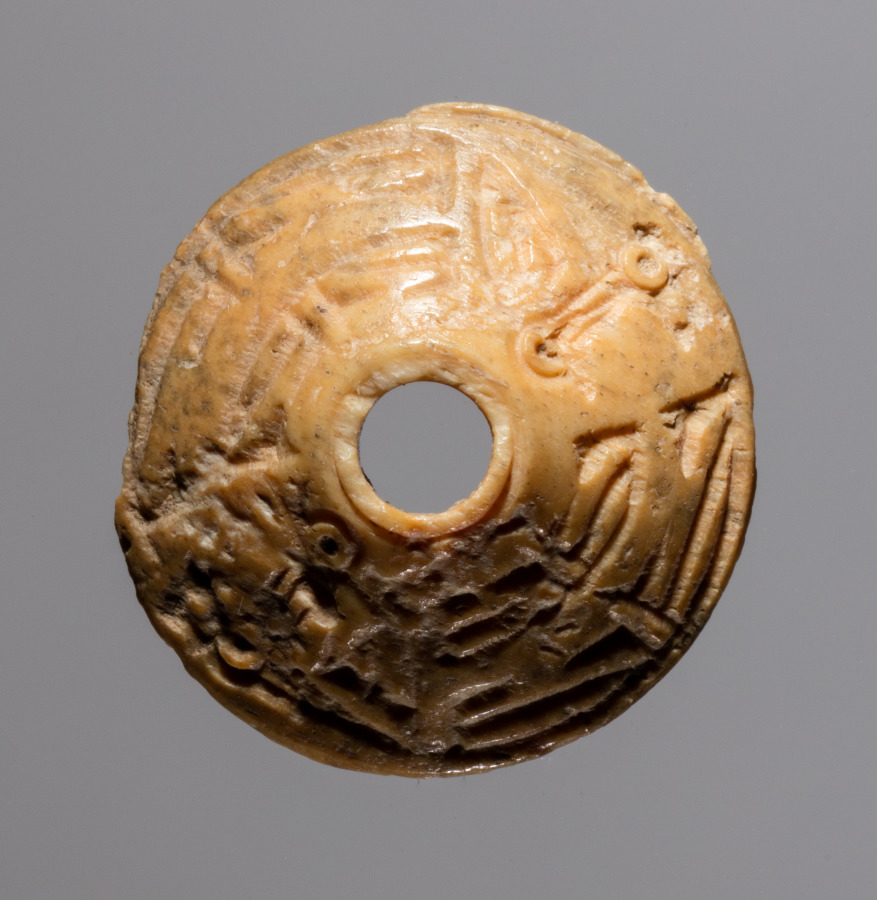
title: Spindle Whorl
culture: Iran, early Islamic period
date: 700s - 900s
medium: bone, incised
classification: Spindle Whorl